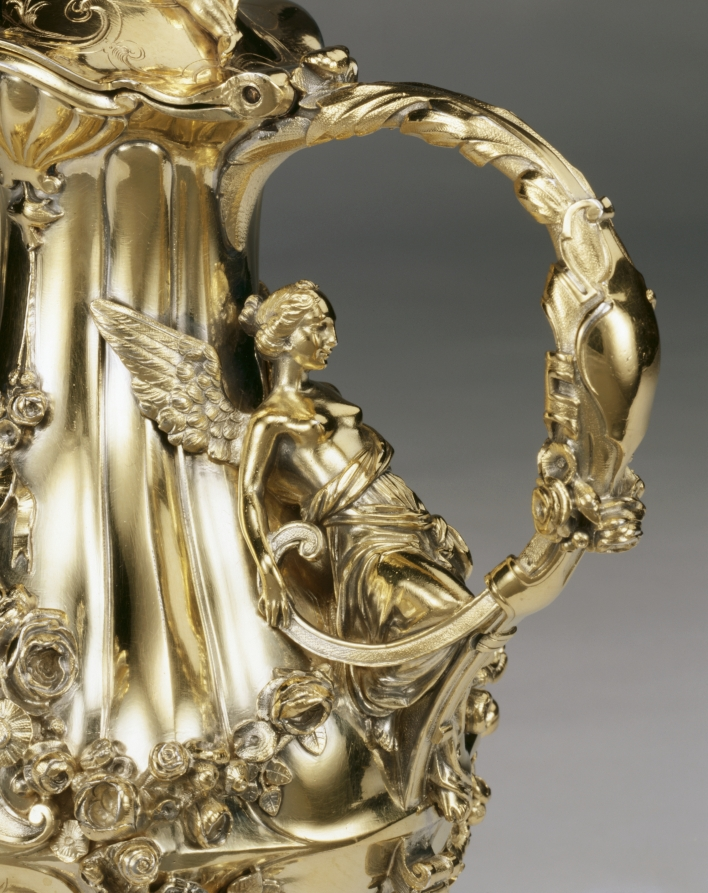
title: Covered Jug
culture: France, 19th century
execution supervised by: Jean-Valentin Morel (French, 1794–1860)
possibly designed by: Jules Dieterle (French, 1811–1889)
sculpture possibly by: Jules Klagmann (French, 1810–1867)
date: c. 1845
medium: gilded silver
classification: Silver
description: The elegance and richness of this ewer demonstrate the high level of technical mastery achieved by its maker. Morel studied under his father, a Parisian lapidary (someone who cuts, polishes, and engraves hard stones), and with Adrien Vachette, a maker of gold boxes. In 1842 he went into partnership with Charles-Edmond Duponchel, which lasted until the late 1840s, at which time he established himself in London, remaining there until 1852, when he returned to Paris. Morel frequentlyfollowed the designs of others, and it has been suggested that in the case of this pitcher his well-known contemporary, Jules Dieterle (1811-1889), may have conceived the overall form. The female figure seems to have been based on a design by the sculptor Jules Klagmann (1810-1867).